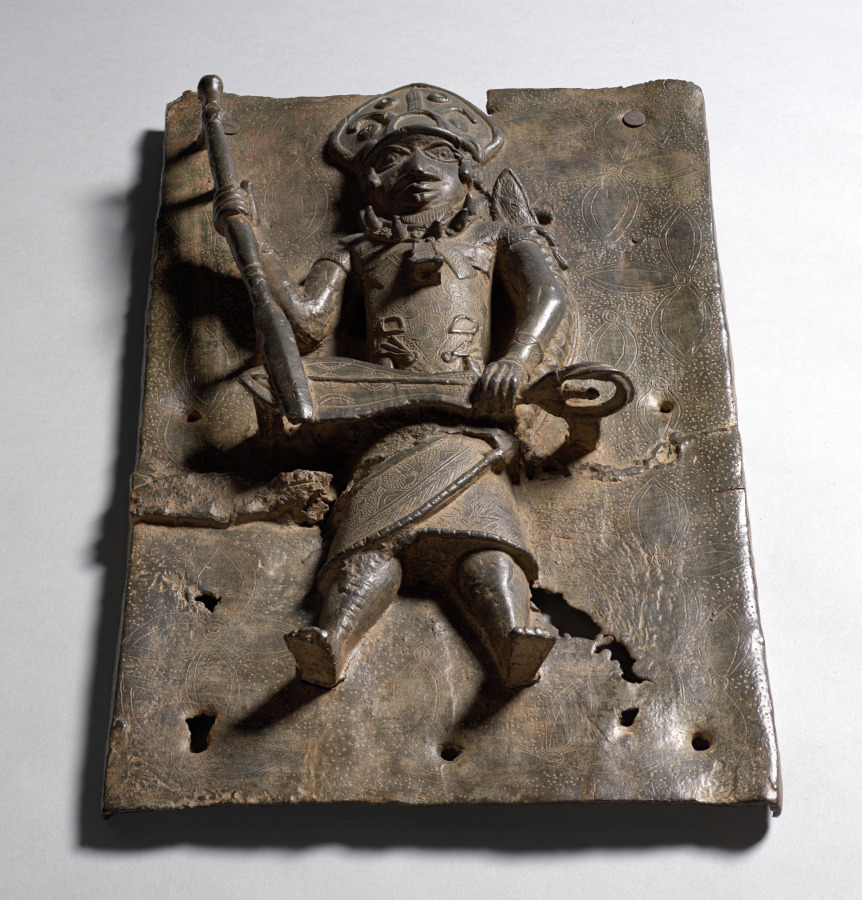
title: Plaque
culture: Nigeria, Benin Kingdom, Ẹdo peoples, members of the Igun Eronmwon (royal brasscasters) guild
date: 1500s–1600s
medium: Copper alloy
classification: Sculpture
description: Craftsmen modeled brass plaques like this in wax before casting them with hot metal. Molds pushed out figures’ general shapes, then details—such as this warrior’s staff and court sword (ẹbẹn)—were added by hand. Reflecting Benin’s global connections, the incised flowers may have Islamic or European origins. Called ebe-amẹn (river leaves) they are identified with Olókun, god of the waters. The interlaced side motifs may connect several early plaques also linked by topic and style. The palace plaques were in storage before the 1897 Siege of Benin. Recently, an art historian virtually reconstructed their former display in the palace based on their dimensions and imagery.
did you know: The bent sides of this plaque once helped attach it to wooden beams in a palace.